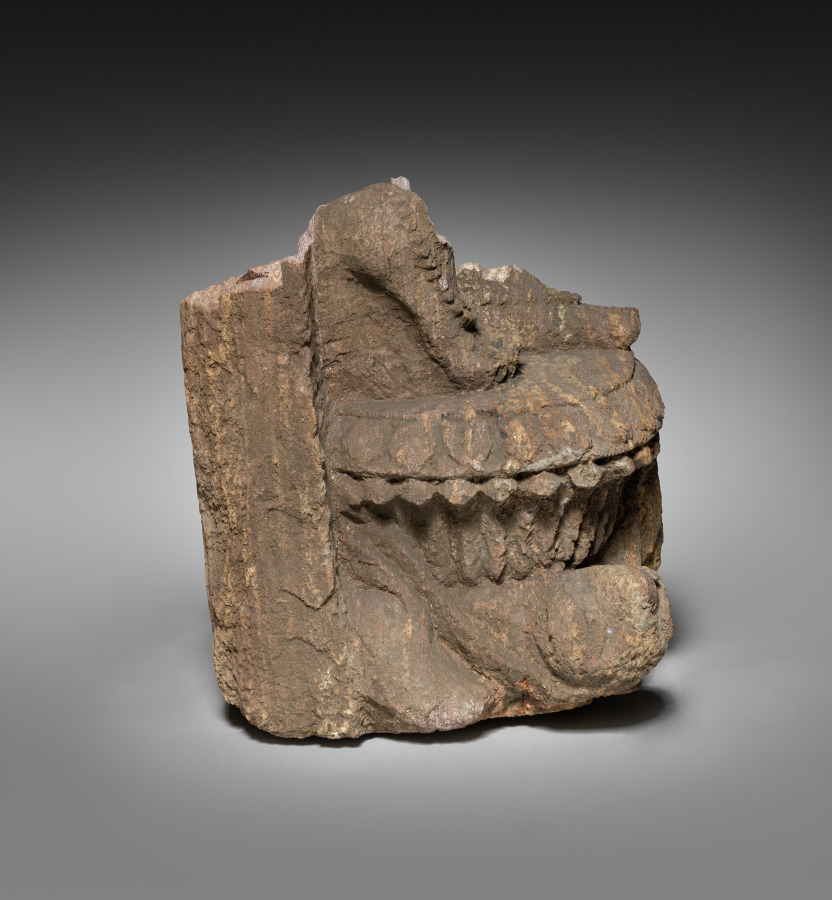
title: Base and Feet of Devata or Yakshi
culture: India, Province of Orissa, 20th century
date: 20th century fake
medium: sandstone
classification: Sculpture